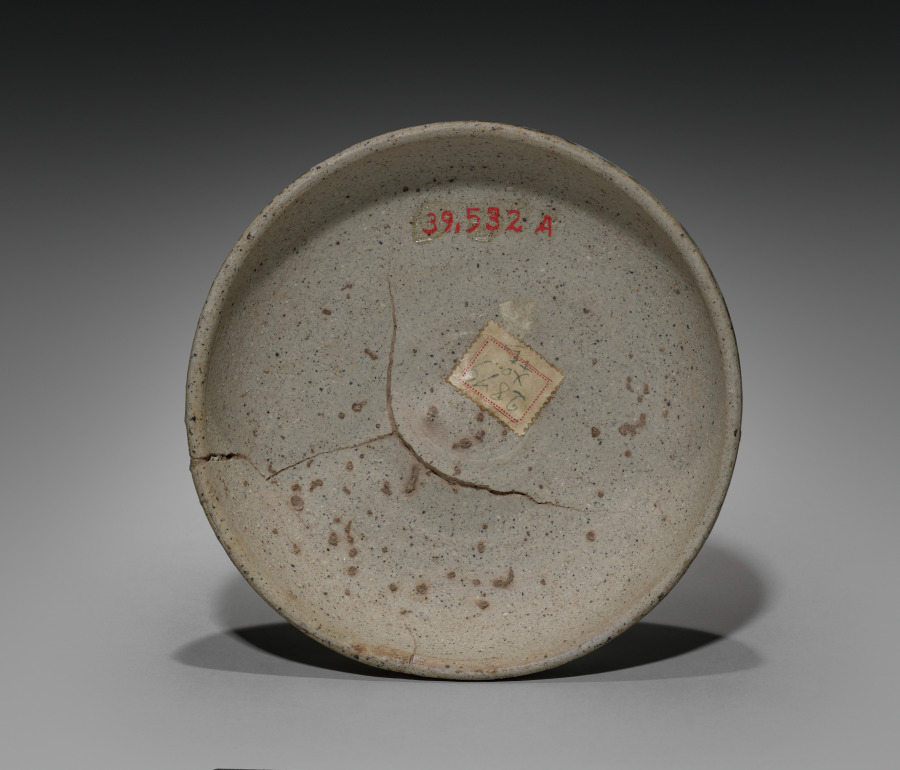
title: Covered Bowl with Painted Decoration (lid)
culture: Siam, Sawankhalok ware, 15th century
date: 1400s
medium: stoneware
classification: Ceramic